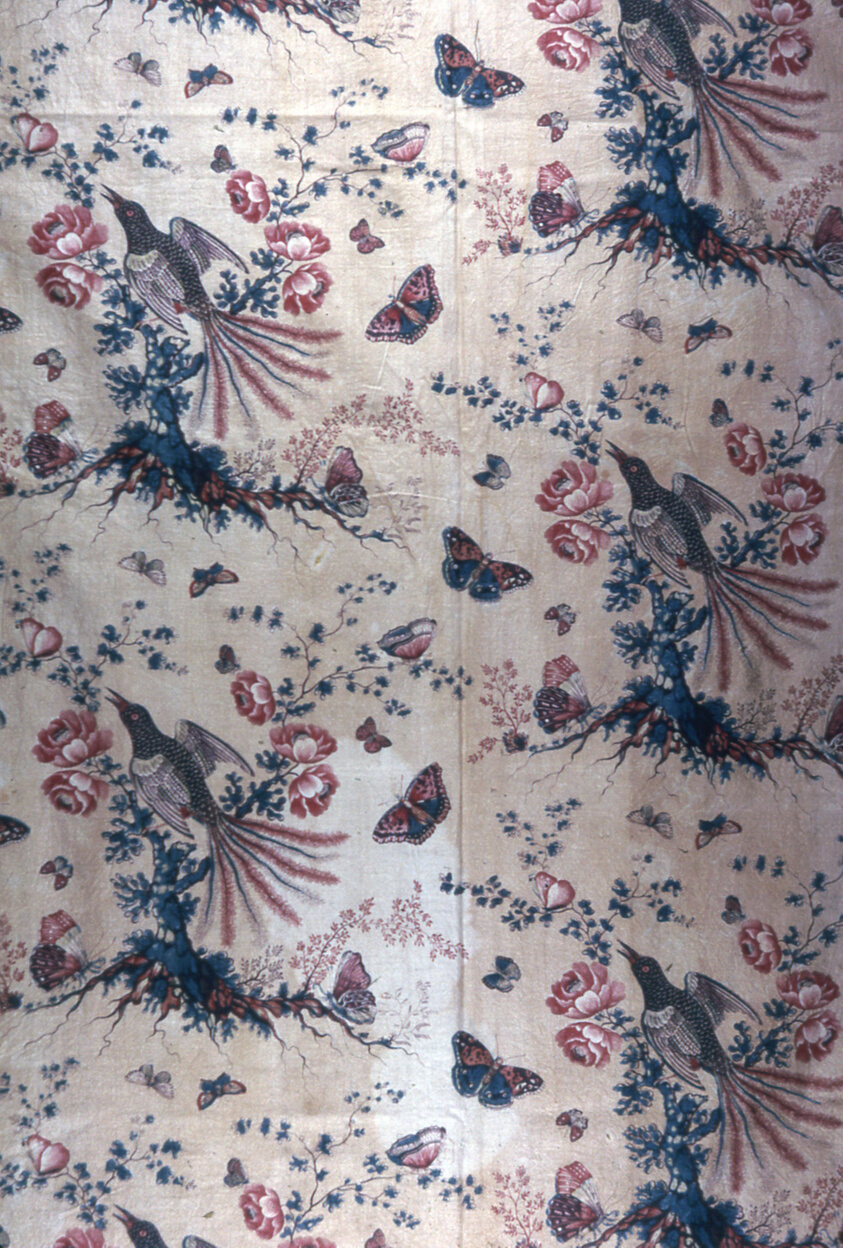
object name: Textile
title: Panel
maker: England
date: c. 1830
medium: Cotton, plain weave; roller and block printed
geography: England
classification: textile; weaving - printed; weaving